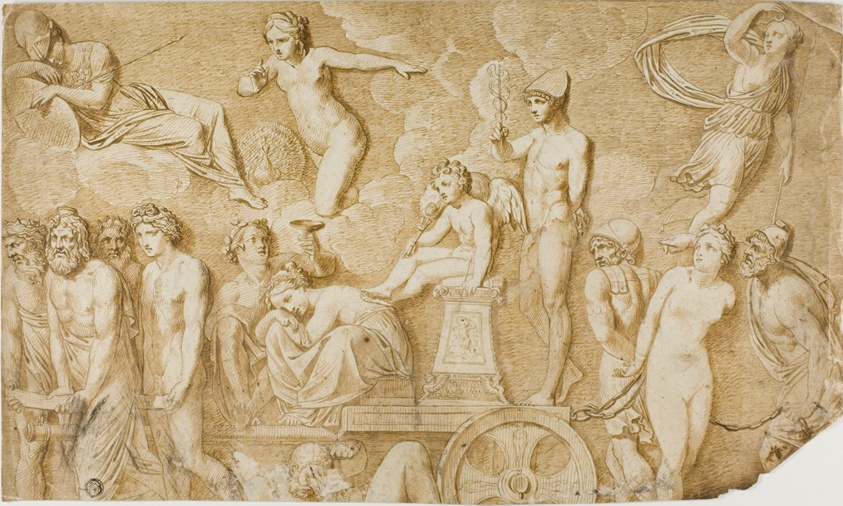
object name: Drawing and Watercolor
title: Triumph of Love (after antique bas-relief)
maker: Attributed to Pompeo Girolamo Batoni; Italian, 1708-1787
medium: Pen and brown ink, over traces of black chalk, on ivory wove paper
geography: Italy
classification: pen and ink drawings; paper; drawings (visual works); prints and drawing